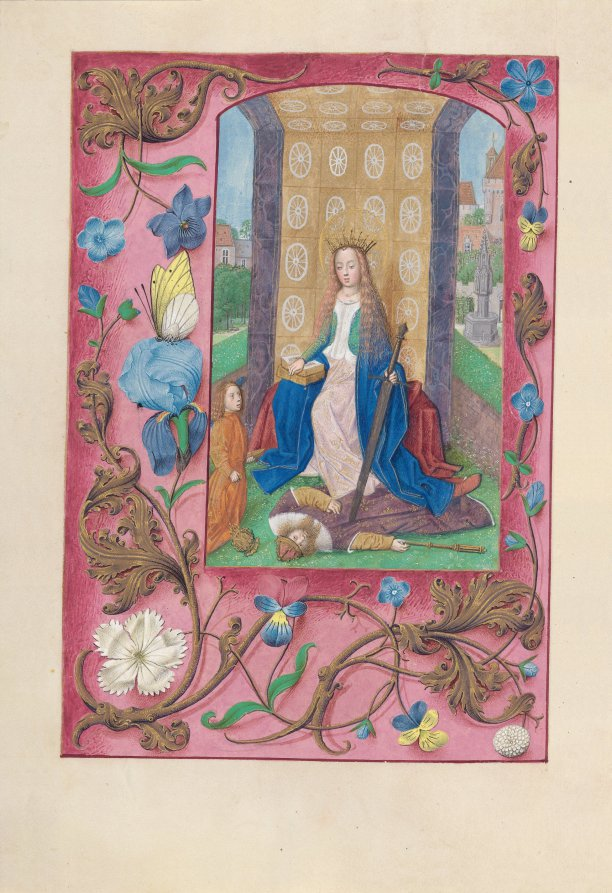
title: Hours of Queen Isabella the Catholic, Queen of Spain: Fol. 189v, St. Catherine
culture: Flanders, Ghent and Bruges, late 15th century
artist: Master of the First Prayerbook of Maximillian (Flemish, c. 1444–1519)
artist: and Associates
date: c. 1500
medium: ink, tempera, and gold on vellum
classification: Bound Volume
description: This manuscript was illuminated by a circle of at least five highly organized manuscript painters active in the Flemish cities of Ghent and Bruges. The principal illuminator was Alexander Bening, who painted the majority of the book's miniatures. Manuscripts produced by this circle of artists are renowned for the decoration of their borders, which typically feature a rich variety of realistically-painted flowers, birds, and butterflies. This prayer book, called a book of hours, was intended not for a cleric, but for the private devotions of a lay person-in this case, Isabella the Catholic, Queen of Spain (1451-1504). Isabella's coat of arms embellishes the book's frontispiece. It is unlikely that the book was commissioned by the Queen herself; rather, she probably received it as a diplomatic gift from someone courting her patronage, perhaps Cardinal Francisco Jimenez de Cisneros. A Franciscan friar, Jimenez was dependent upon Isabella for his advancement, first to the post of Queen's confessor in 1492, and then to Archbishop of Toledo in 1495.